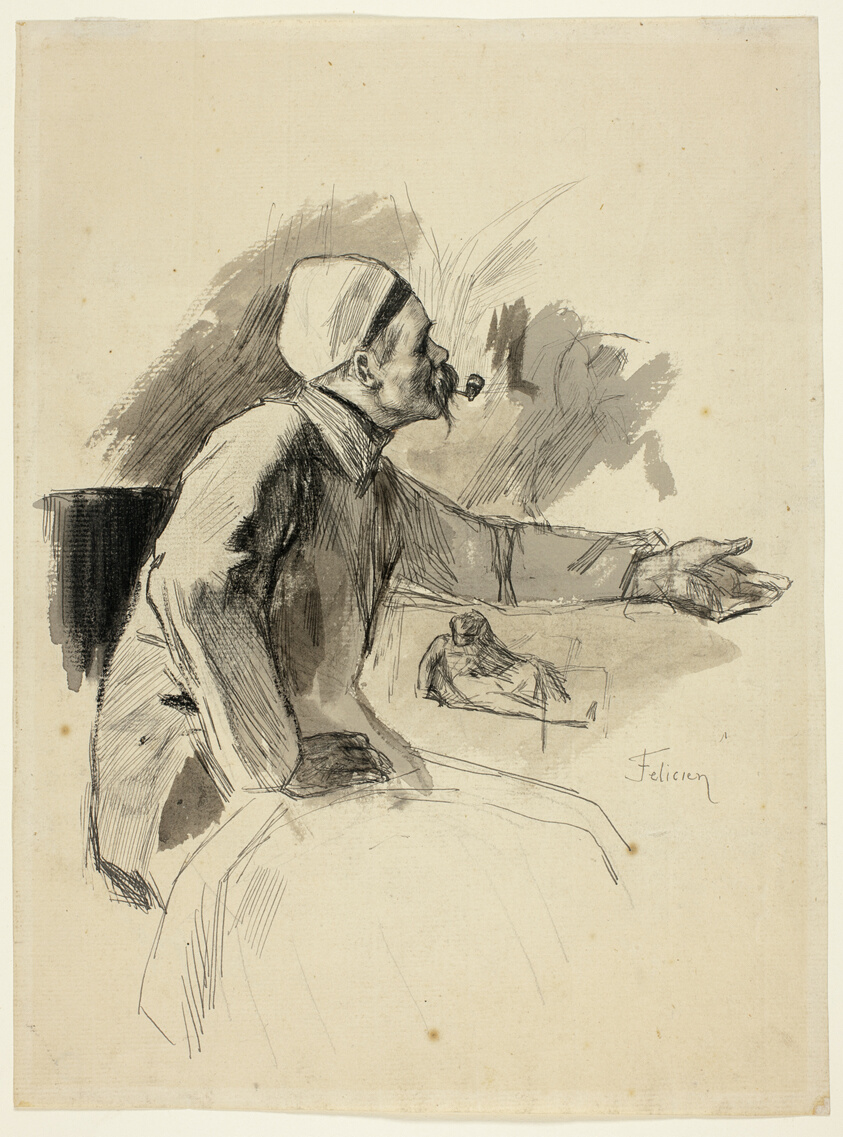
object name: Drawing and Watercolor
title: Seated Man with Extended Left Arm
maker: Félicien Rops (Belgian, 1833-1898)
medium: Pen and black ink, with brush and gray wash and black crayon, over graphite, on cream laid paper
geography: Belgium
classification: pen and ink drawings; drawings (visual works); prints and drawing